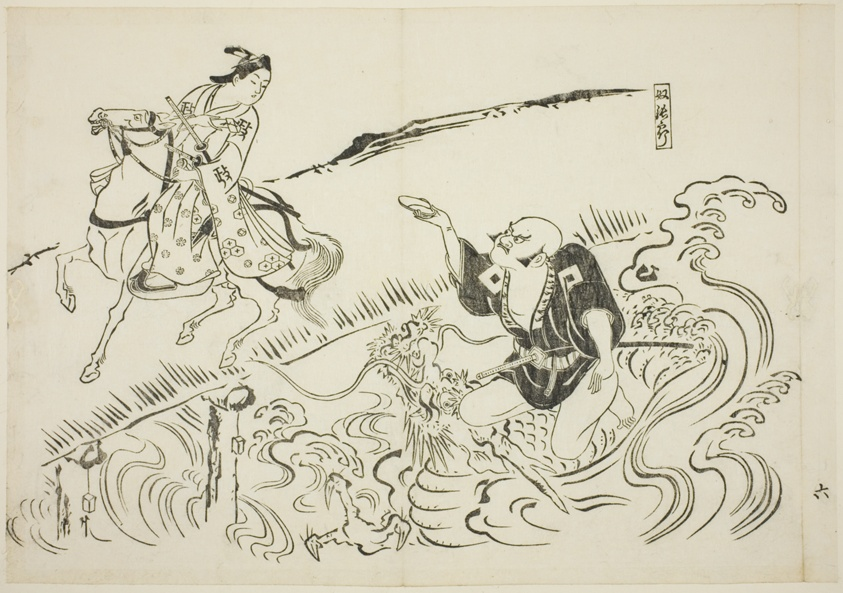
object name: Print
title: The Servant Choryo (Yakko Choryo), no. 6 from a series of 12 prints depicting parodies of plays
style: Japanese (culture or style)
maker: Okumura Masanobu (Japanese, 1686-1764)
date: c. 1716/35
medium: Woodblock print; oban, sumizuri-e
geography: Japan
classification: woodblock print; print; asian art; woodblock